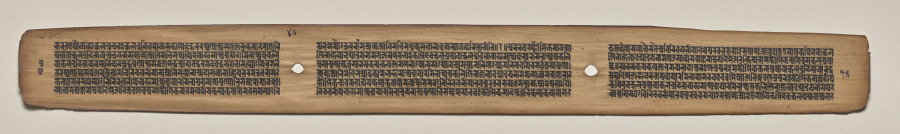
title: Text, folio 46 (verso), from a Manuscript of the Perfection of Wisdom in Eight Thousand Lines (Ashtasahasrika Prajnaparamita-sutra)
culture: Eastern India, Bihar, Vikramashila Monastery. Painting: Nepal, Kathmandu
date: Sunday, September 14, 1119 (year 239 of the Newar Samvat in the month of Ashvina)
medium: gum tempera and ink on palm leaves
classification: Painting